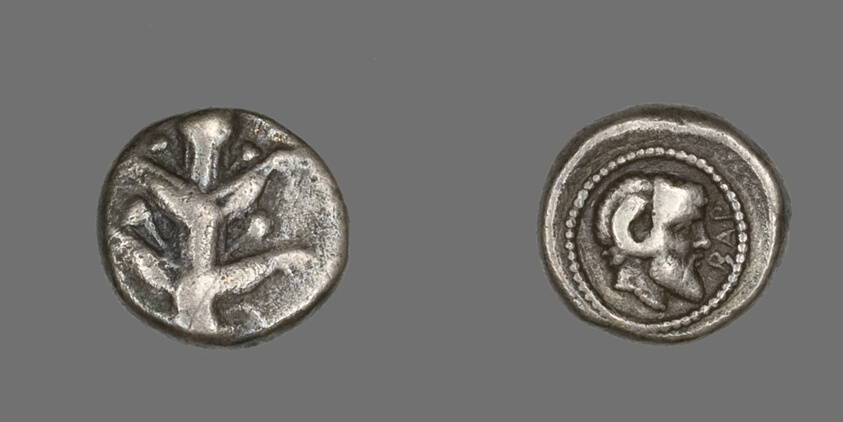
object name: Coin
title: Coin Depicting Silphium Plant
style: greek, ancient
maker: Greek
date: 480-435 BCE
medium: Silver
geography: Al Marj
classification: coin; ancient art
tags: mythological figures, zeus